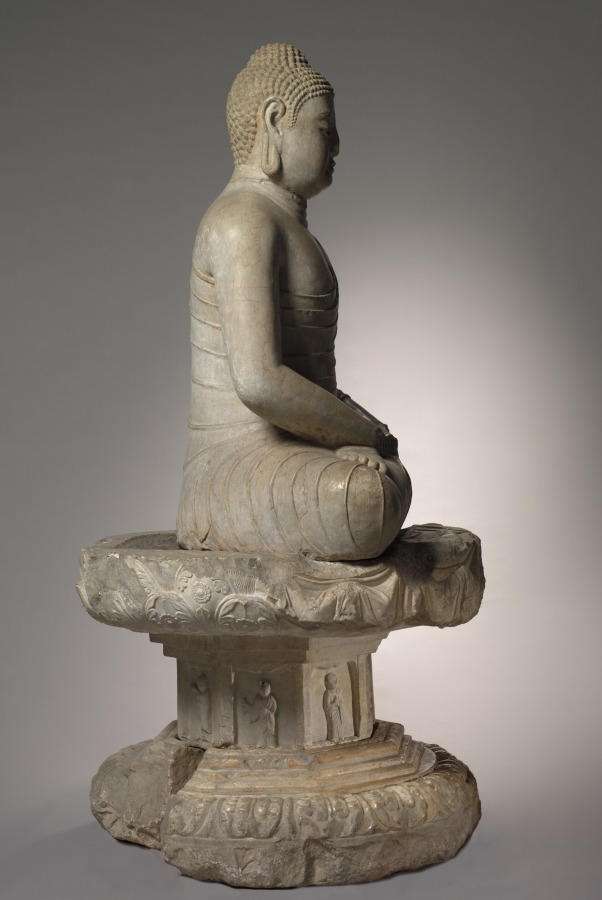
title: Fang Xuanling Pedestal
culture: China, Tang dynasty (618-907)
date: 647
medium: marble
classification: Sculpture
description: This double lotus pedestal exhibits the rich, ornate style of early Tang sculpture. It was commissioned by the Duke of Liang, Fang Xuanling (578–648), for the blessing of his second son and daughter-in-law, the Tang imperial princess of Gaoyang. The iconography and inscription suggest that it originally went with a statue, now missing, of Shakyamuni, the historical Buddha, instead of Amitayus. Today the pedestal is topped with Amitayus, the Buddha of Infinite Life, seated in meditation. Although the pedestal was not made with the statue, the combination is faithful to the original artistic conception.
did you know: In front, the top layer of the pedestal has an abstract curvilinear motif suggesting drapery; the rear is carved with a flower-and-leaf motif.